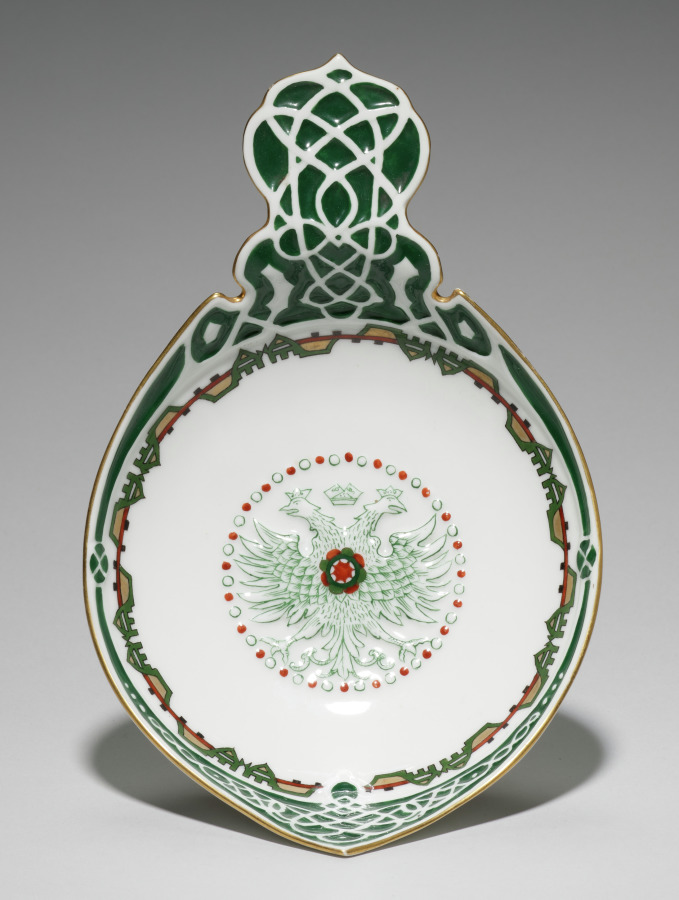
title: Porcelain "Kovsh"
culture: Russia, St. Petersburg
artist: Kornilov Brothers (Russian, established 1835)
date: 1893–1917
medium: porcelain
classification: Ceramic